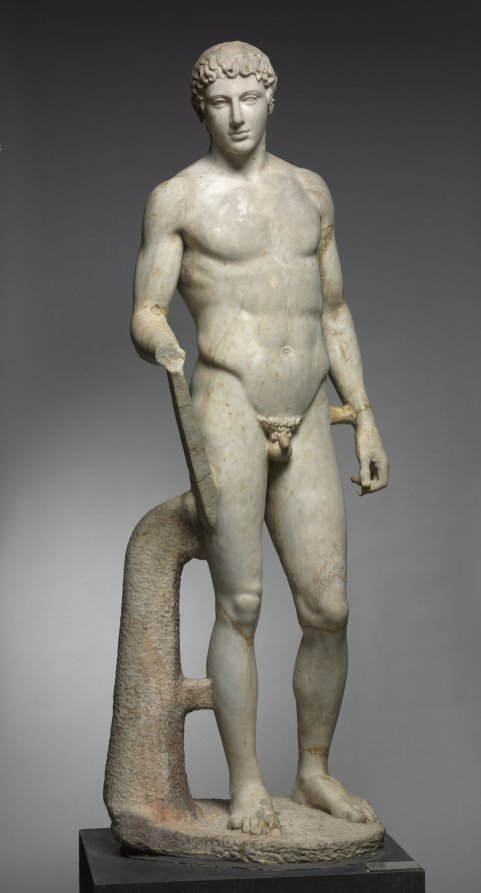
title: Statue of an Athlete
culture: Italy, Roman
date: 1–100 CE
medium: marble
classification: Sculpture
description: This idealized athlete recalls Greek sculptural types invented and popularized during the 400s BC. Large-scale athletes and other sculptures like this were originally created by famous artists as sanctuary dedications. Centuries later, they were widely copied and adapted by Roman sculptors, whose clients sought their own versions of earlier masterpieces. Working in marble rather than bronze, these sculptors added certain elements for stability, such as the struts and the large tree trunk beside the right leg here. Sculptures like this one are profoundly complex, made by and for Romans but descended from Greek ancestors.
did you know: For many years, this sculpture stood in the rotunda of the Cleveland Museum of Art.